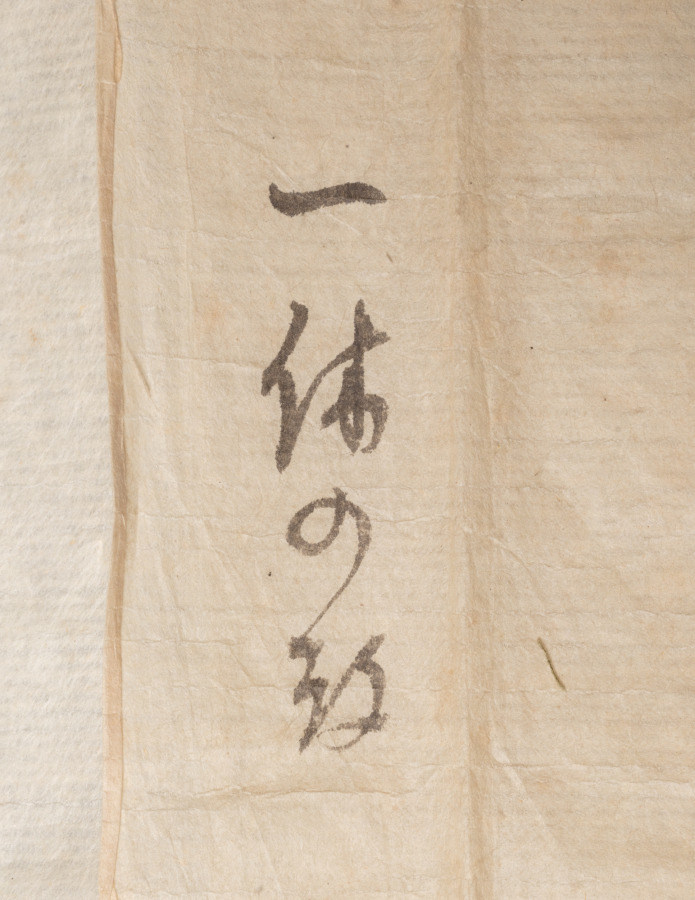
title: Calligraphy with Willow and Swallows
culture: Japan, Muromachi period (1392–1573)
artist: Ikkyū Sōjun (Japanese, 1394–1481)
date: 1400s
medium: hanging scroll, ink on paper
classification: Painting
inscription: How many days has it rid itself of the crow’s cloth? It knows not!/ Lovely is its body so nimble and neat./ Neither men of wealth, courtly position, or power can come close to the unfettered, noble swallow!/ With the coming of spring, it seems to be flying about, dancing around the grass hut of the foolish Priest. signed: Unkasō Isshi Tōkai jun Ikkyū shi ga ippitsu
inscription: outer box inscribed: Ikkyū Ōshō Enshi-zu Jigasan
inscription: inner box side lid inscribed: Showa 50 (1975), November by Tayama Honan with kao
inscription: Inner box side lid inscribed: Ikkyū Ōshō Bokuseki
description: The famed Buddhist monk Ikkyū is best remembered for his calligraphy. Calligraphic conventions of his time called for brushwork that did not vary much in style from character to character. However, as Ikkyū’s lines progress, his brushwork wanders between standard script and a sort of shorthand, marked by an uneven distribution of ink and a reduction of the characters to only the most necessary strokes. Ikkyū’s direct communication of emotion via brushwork became characteristic of the works produced by monks affiliated with the temple Daitokuji later in the Edo period (1615–1868).